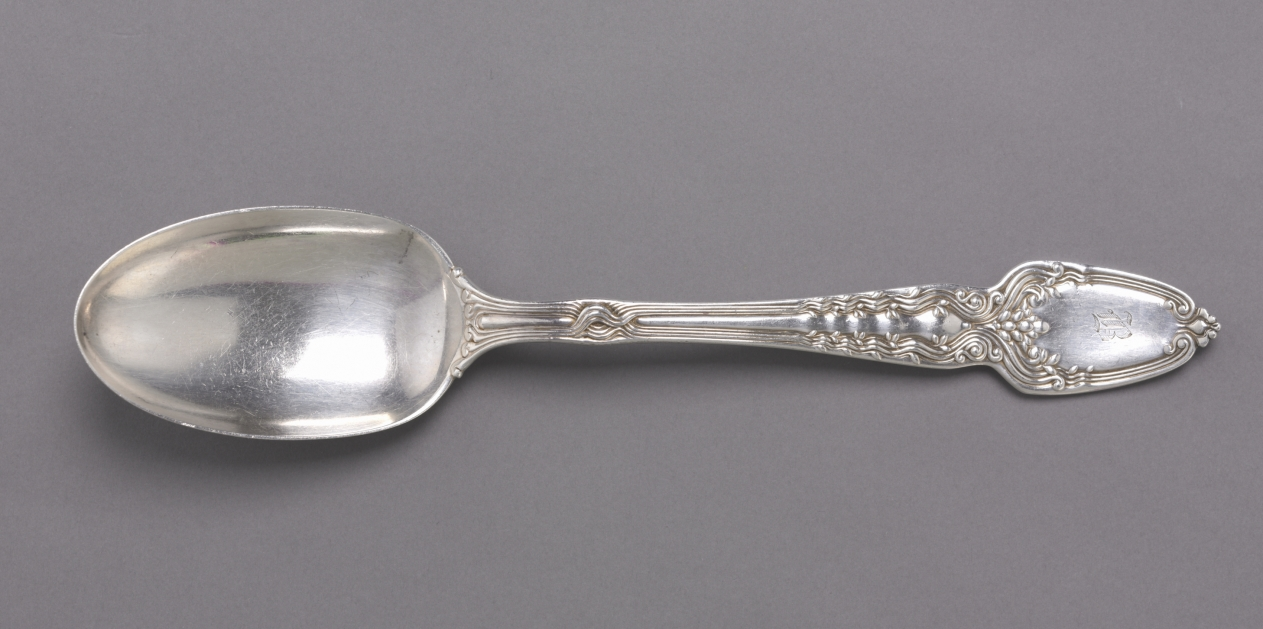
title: Table Spoon (Pattern "Broom Corn")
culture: America, New York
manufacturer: Tiffany & Co. (America, New York, est. 1837)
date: c. 1890–1900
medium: Silver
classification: Silver